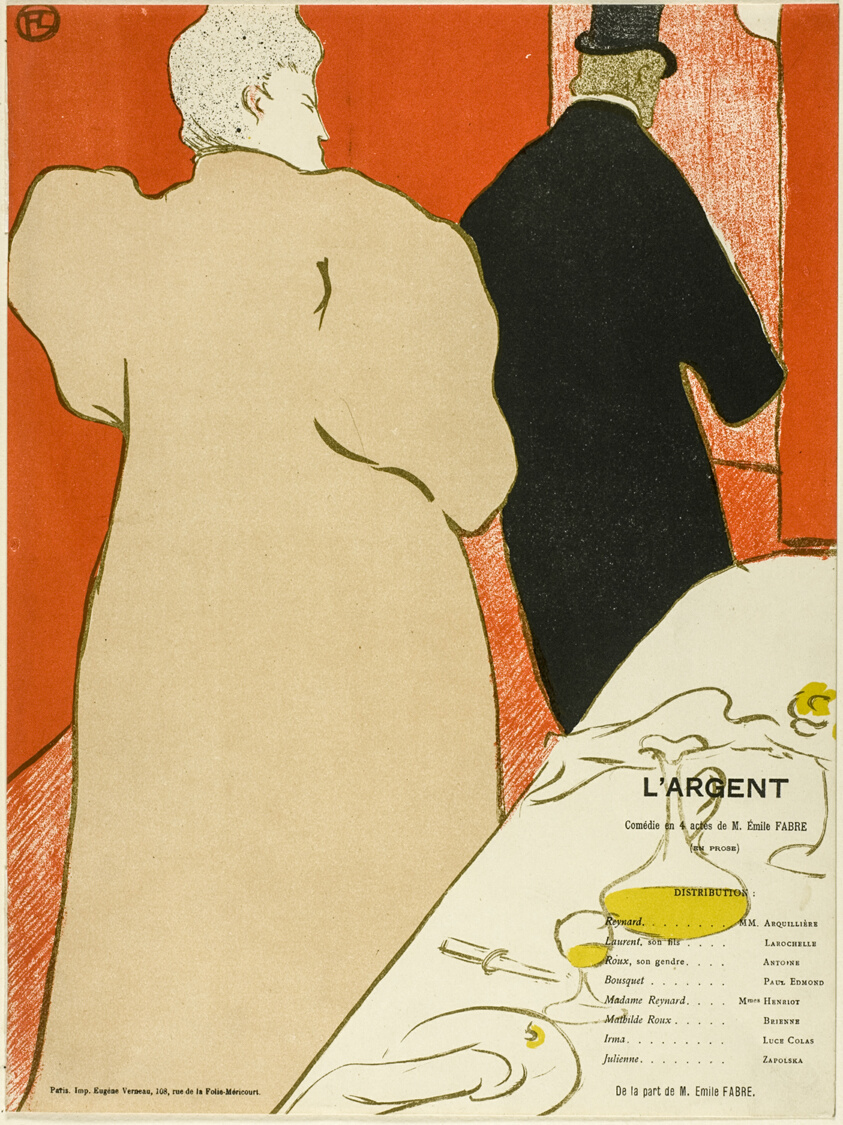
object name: Print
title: Program for L'Argent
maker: Henri de Toulouse-Lautrec (French, 1864-1901)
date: 1895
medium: Color lithograph on cream wove paper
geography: France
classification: lithograph; print; prints and drawing